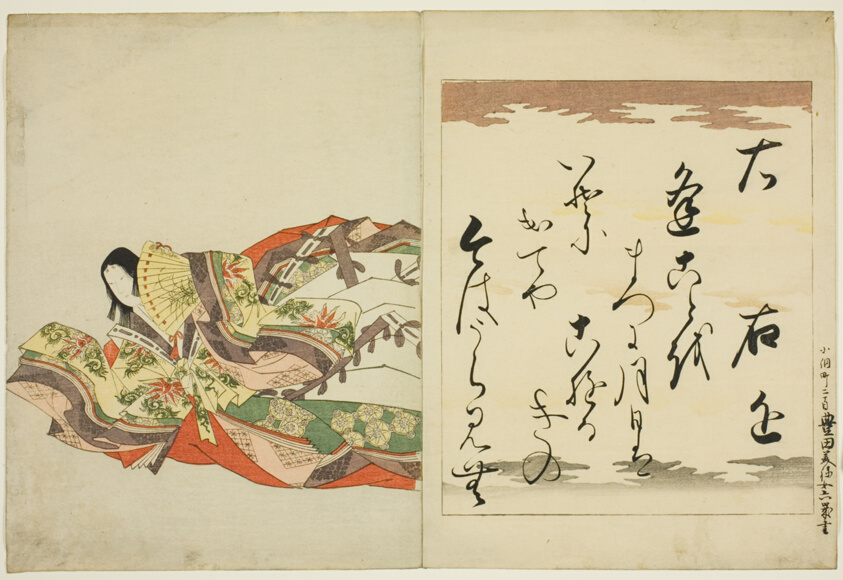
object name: Print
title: The Poetess Ukon, from the series The Thirty-six Immortal Women Poets (Nishikizuri onna sanjurokkasen)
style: Japanese (culture or style)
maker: Chobunsai Eishi; Japanese, 1756-1829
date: Edo period (1615–1868), 1801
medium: Page from a color woodblock-printed volume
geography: Japan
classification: woodblock print; print; asian art